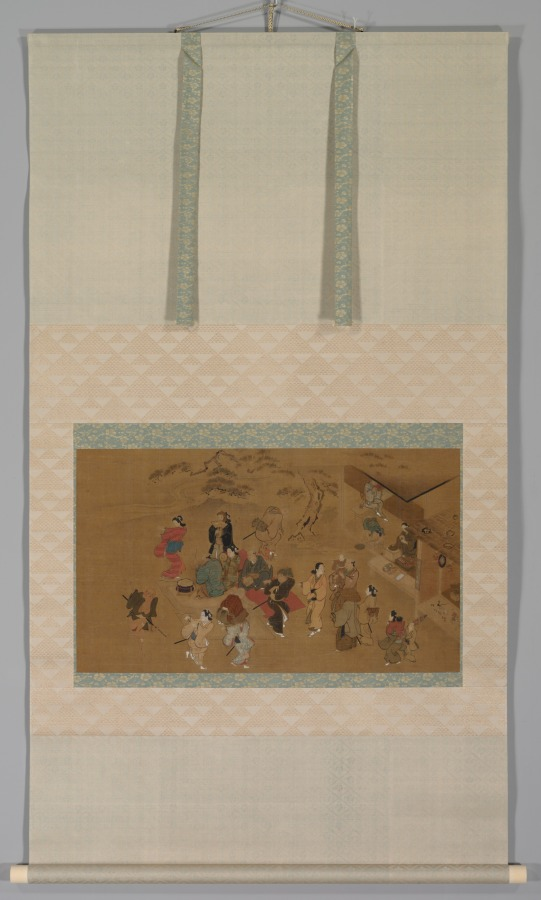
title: Spring Dance Scene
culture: Japan, Edo period (1615–1868)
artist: attributed to Hishikawa Moronobu (Japanese, c. 1618–1694)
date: mid- to late 1600s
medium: hanging scroll; ink and color on silk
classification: Painting